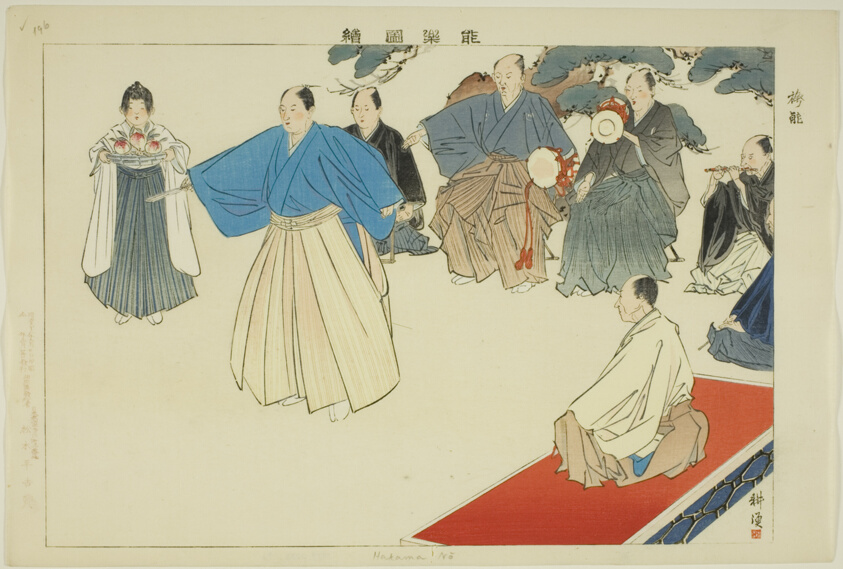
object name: Print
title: Hakama No, from the series "Pictures of No Performances (Nogaku Zue)"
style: Japanese (culture or style)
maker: Tsukioka Kogyo; Japanese, 1869-1927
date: 1898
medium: Color woodblock print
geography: Japan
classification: woodblock print; print; asian art